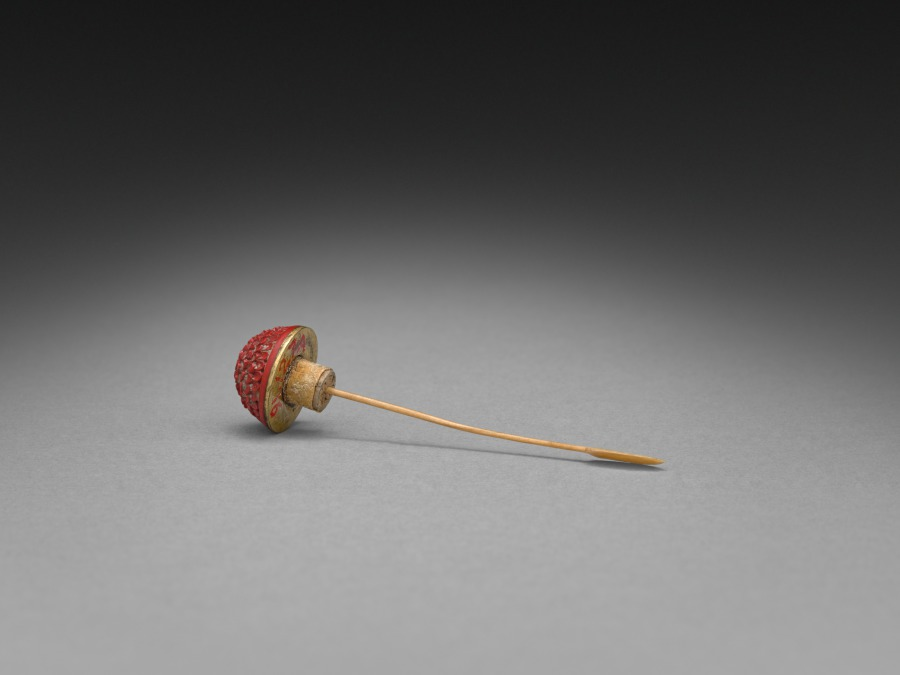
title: Snuff Bottle with Flowers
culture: China, Qing dynasty (1644-1911), Qianlong mark and reign (1736-95)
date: 1736–95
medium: carved cinnabar lacquer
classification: Lacquer